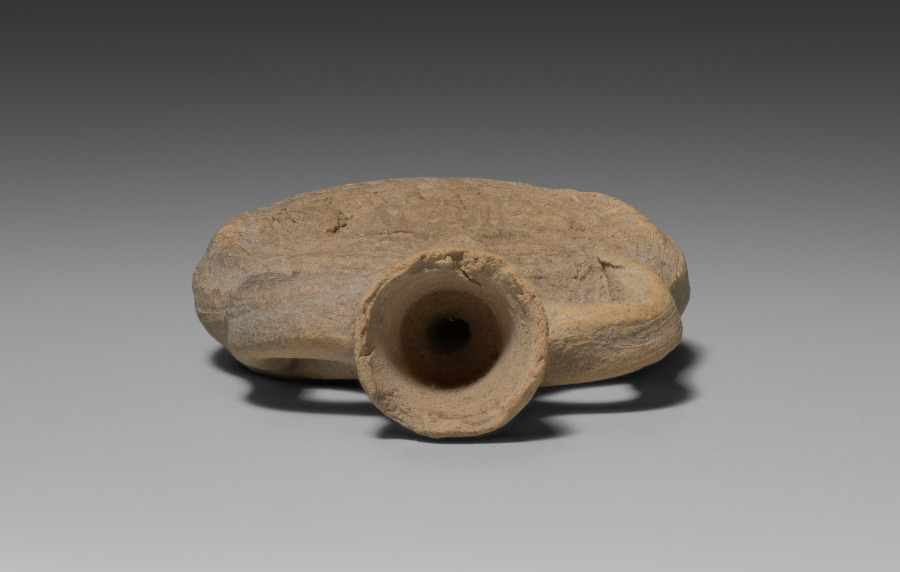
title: Pilgrim's Flask with Saint Menas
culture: Egypt, Coptic period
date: 400–600 CE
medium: terracotta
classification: Ceramic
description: These flasks bear the image of Saint Menas, an early martyr of the Christian Church whose shrine was in the desert southwest of Alexandria in Egypt. These flasks were probably used by pilgrims to hold oil taken from the lamp that burned over this saint's tomb. Probably manufactured near the shrine, pilgrim's flasks often bear decorations hinting at their place of origin, as is the case here.